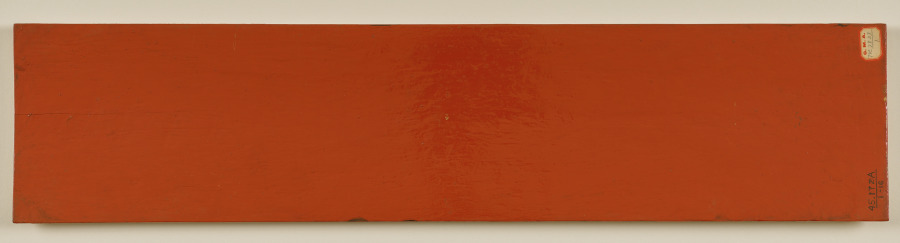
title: Kammavacha: Buddhist Ordination Text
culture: Myanmar (Burma)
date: 1800s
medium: Cover: lacquer, gilding, and glass appliqué on wood; leaves: lacquer and gilding on cloth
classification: Manuscript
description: In premodern Burma, lay people commissioned lavishly ornamented manuscripts for ceremonial occasions, when officiants would read aloud from the text. Written in black lacquer, the text is in the language of Pali written in a Burmese script. It contains ordination rites and procedures for monastic ceremonies. The second to last page is covered with intricately drawn, winged celestial beings (nats) in gestures of praise. They fly amid intertwining vegetation—denoting bounty—that grows from serpentine forms that refer to rain clouds. Lionlike forms inhabit the space with them. The top and bottom covers are equally ornamented with jeweled floral patterning.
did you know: The Pali text of this manuscript is written in Burmese square script, which is also known as "tamarind seed script."